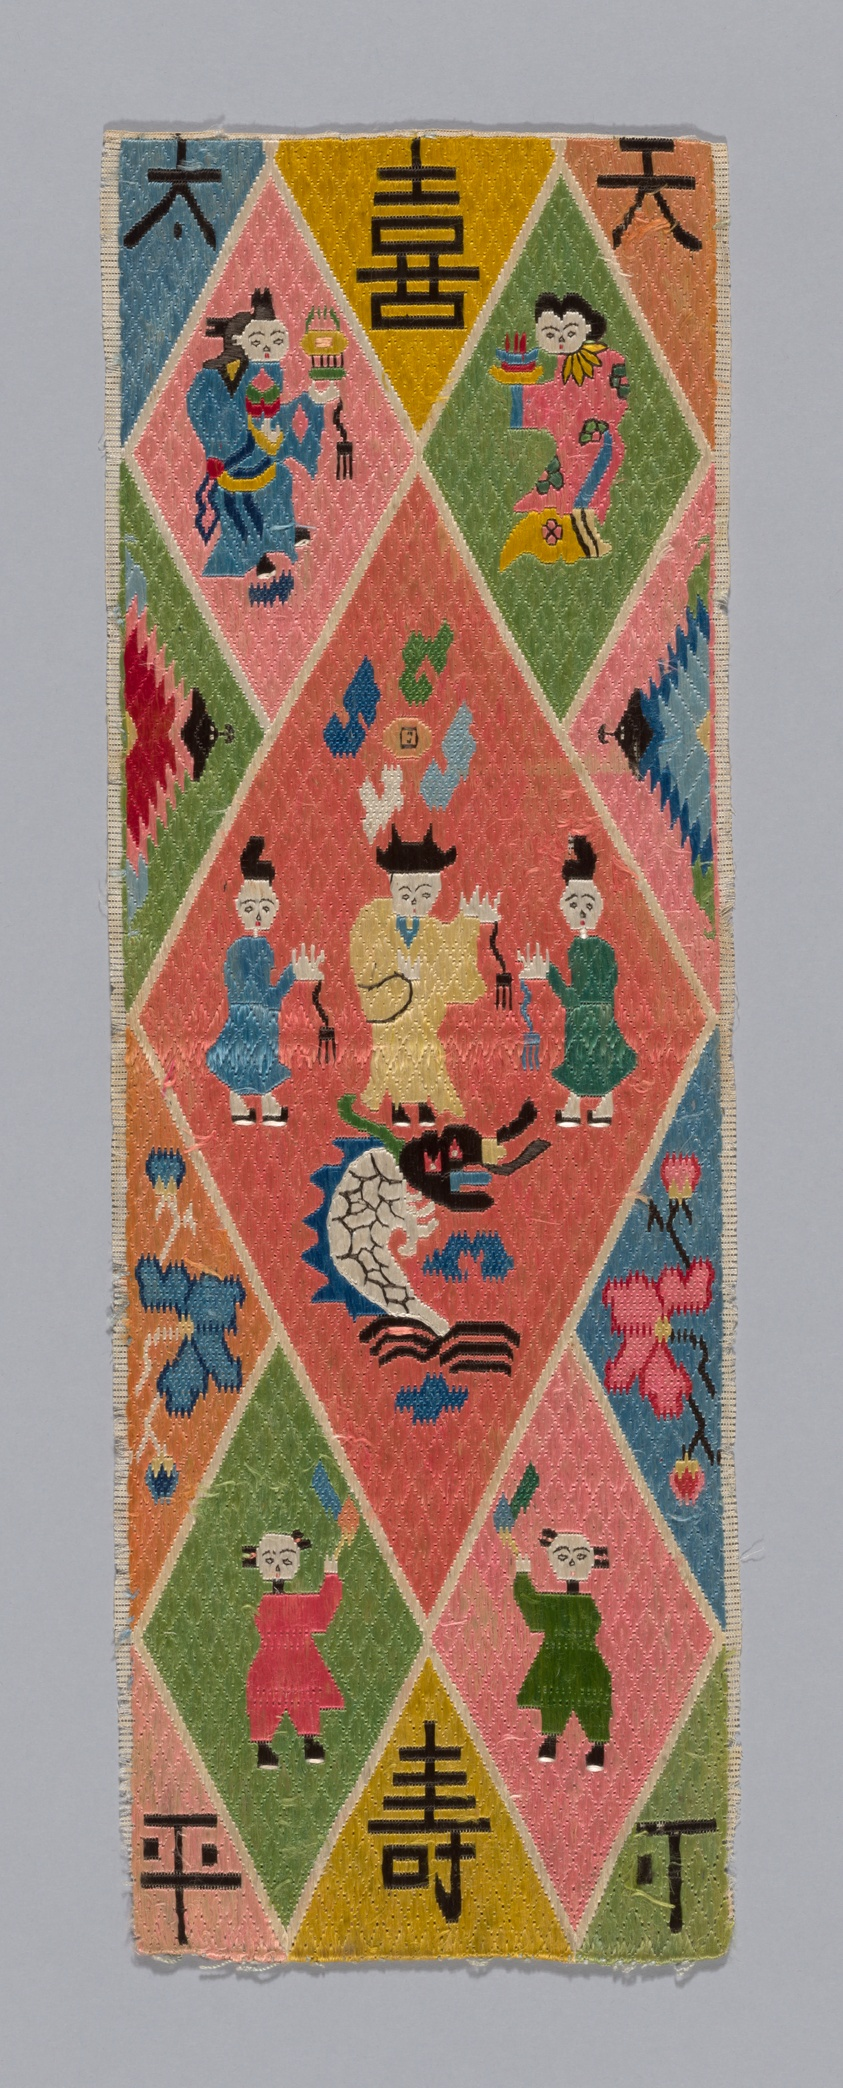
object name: Textile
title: Panel (possibly from Woman's Garment)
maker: China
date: 1875/1900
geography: China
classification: textile; needlework - costume; needlework (visual works)